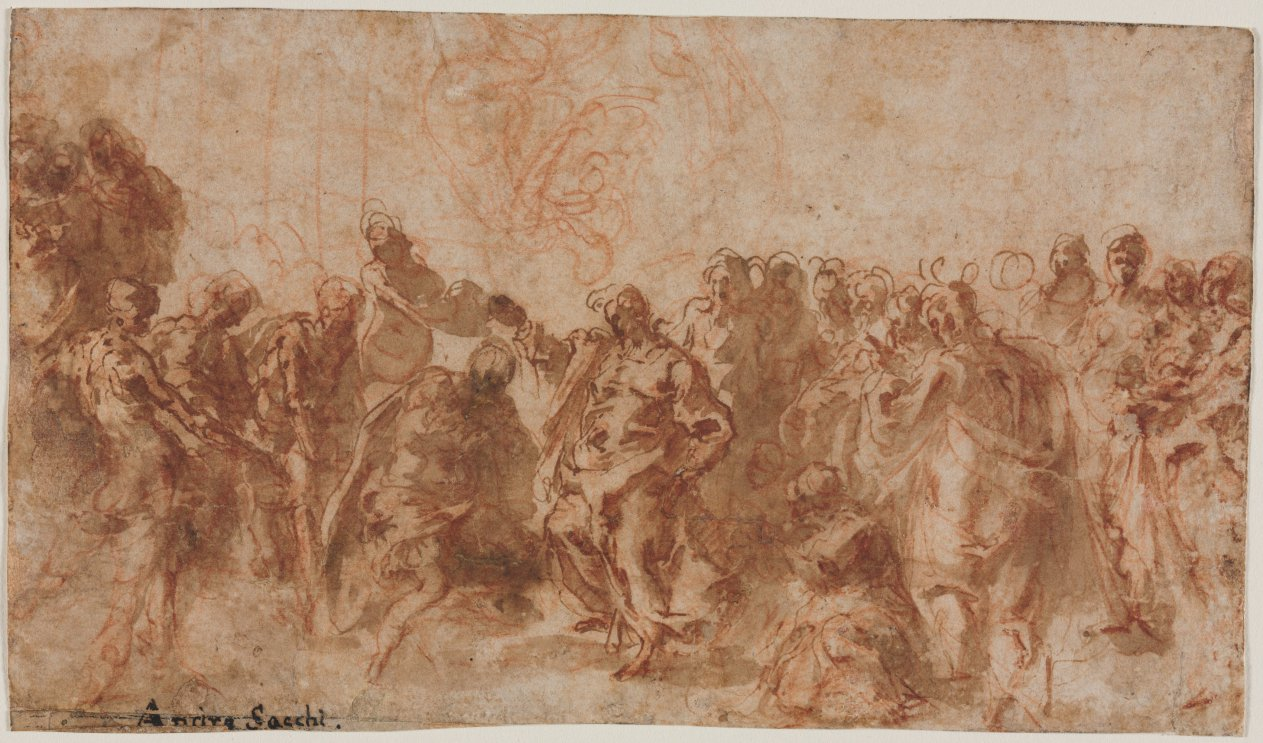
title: The Baptism of Christ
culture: Italy, 17th century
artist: Cesare Pollini (Italian, c. 1560-c. 1630)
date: c. 1600–1630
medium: pen and brown ink and brush and brown wash and red chalk; traces of framing lines in black chalk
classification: Drawing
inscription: lower left, in brown ink: Andr[e?] Sacchi .